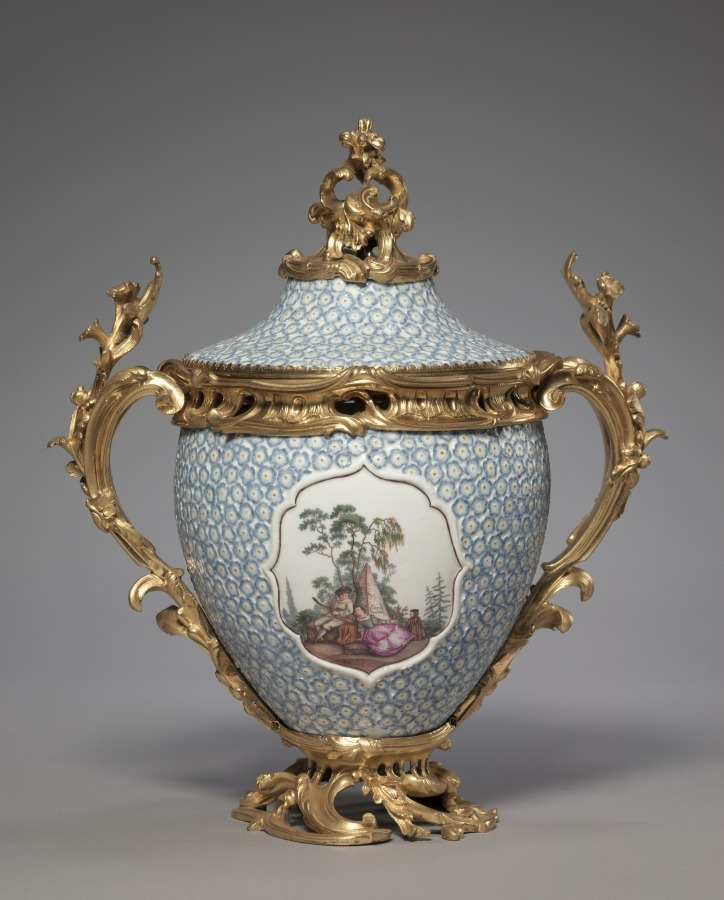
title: Covered Vase (2 of 2)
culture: Germany, Meissen, 18th century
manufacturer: Meissen Porcelain Factory (German, est. c. 1710)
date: mid-1700s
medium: porcelain mounted in gilt bronze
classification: Ceramic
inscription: on obelisk located in one of the cartouche openings, the date 1749 appears.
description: One of these vases is dated 1749. They were perhaps part of a set of four covered vases that we know from documents were acquired by Mme. de Pompadour, mistress of Louis XV in 1752.